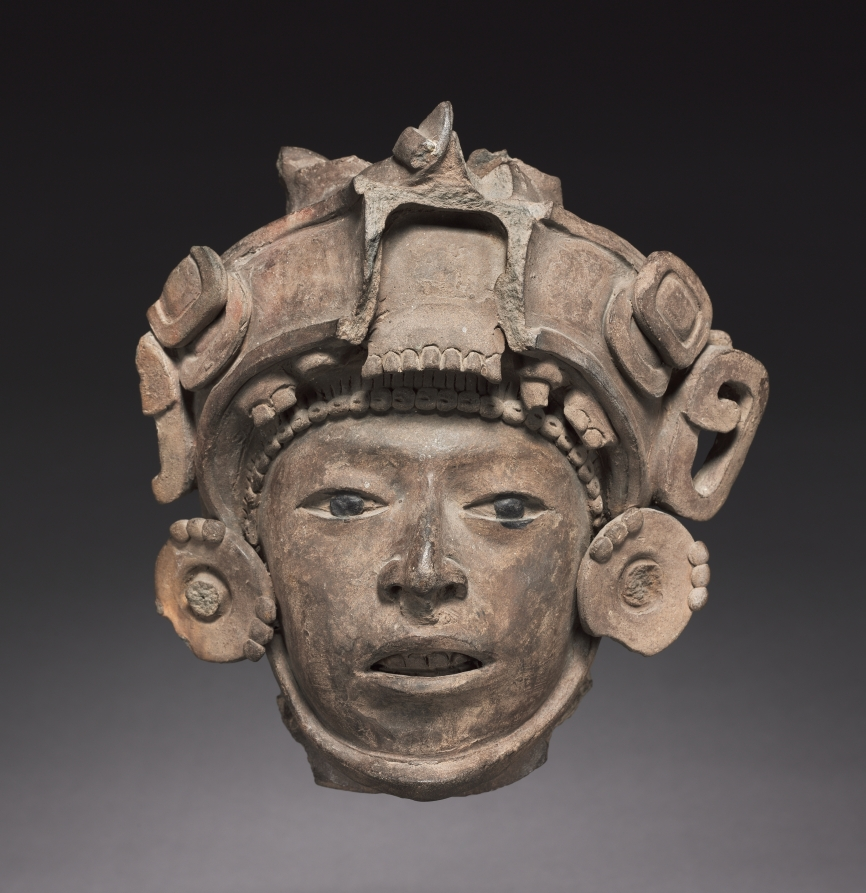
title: Head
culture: Mexico, Classic Veracruz, 7th-10th Century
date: c. 600–900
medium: earthenware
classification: Sculpture